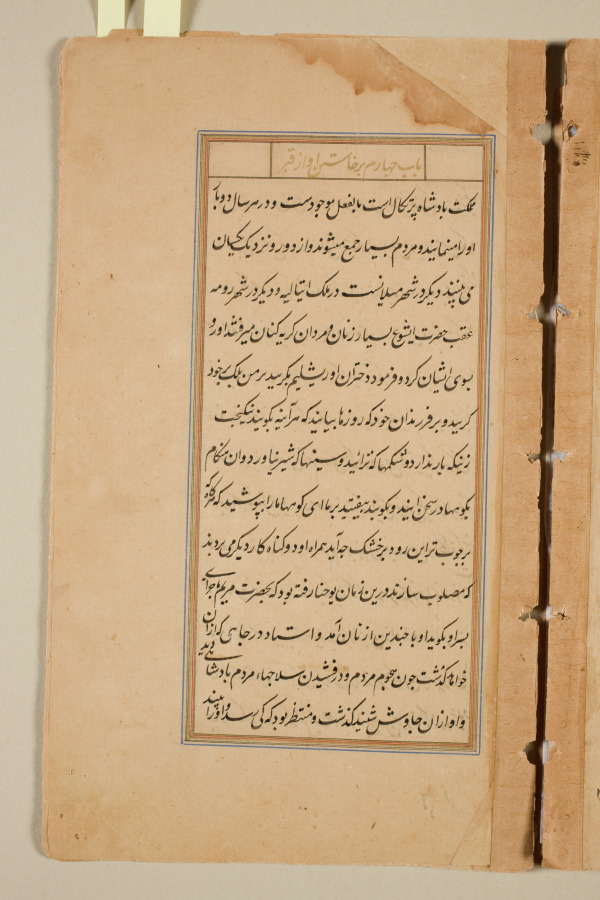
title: Text page from a Mirror of Holiness (Mir’at al-quds) of Father Jerome Xavier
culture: Mughal India, Allahabad, made for Prince Salim (1569–1627)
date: 1602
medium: Ink and gold on paper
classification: Manuscript